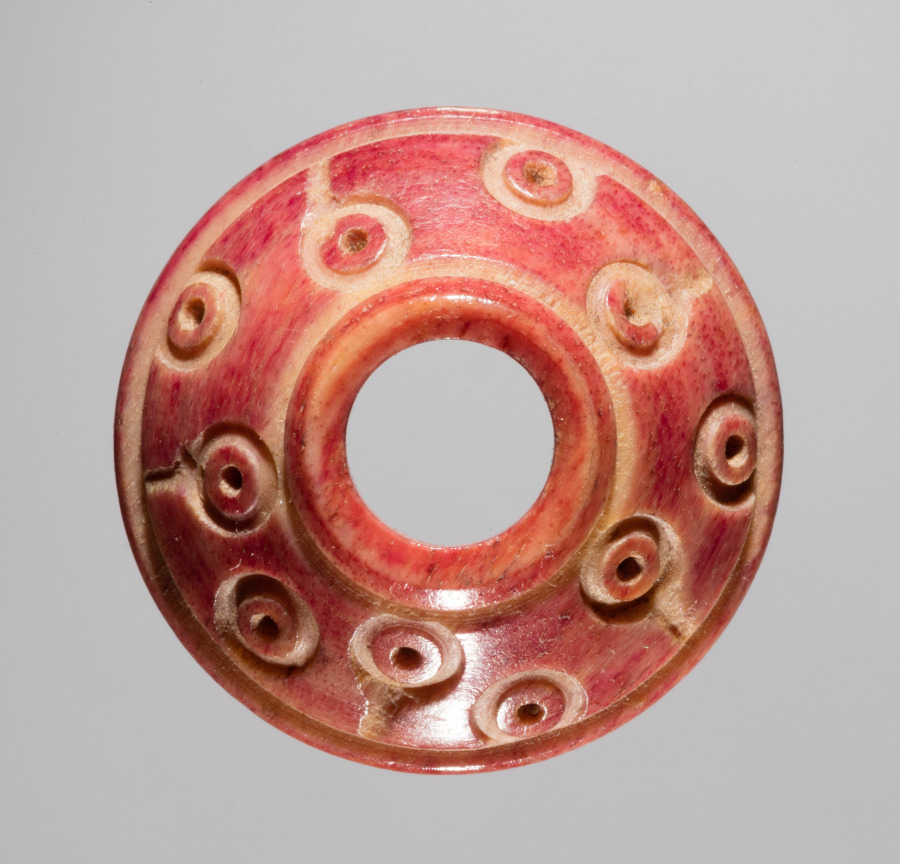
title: Spindle Whorl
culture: Iran, early Islamic period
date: 700s - 900s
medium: bone, incised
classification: Spindle Whorl